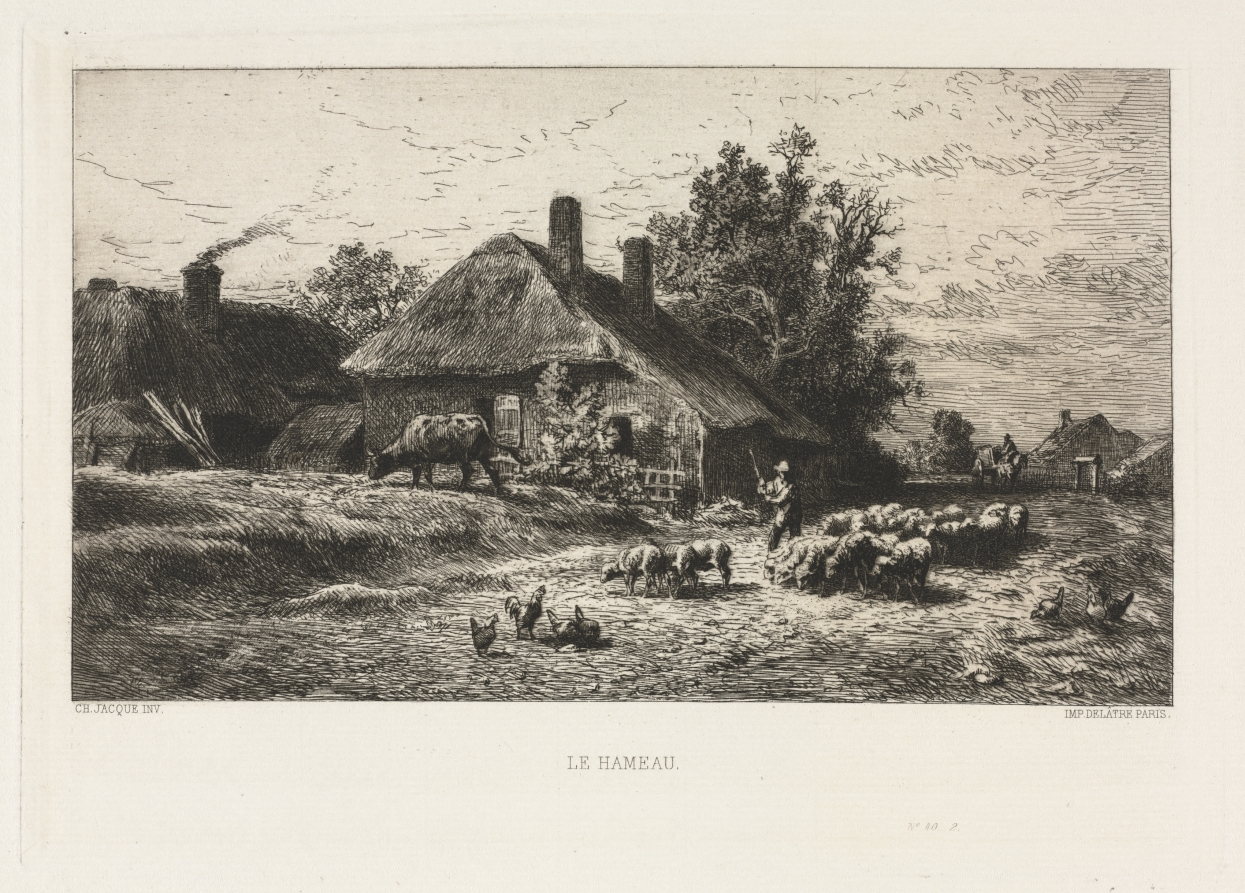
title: The Hamlet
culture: France, 19th century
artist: Charles-Émile Jacque (French, 1813–1894)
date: 1867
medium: etching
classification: Print